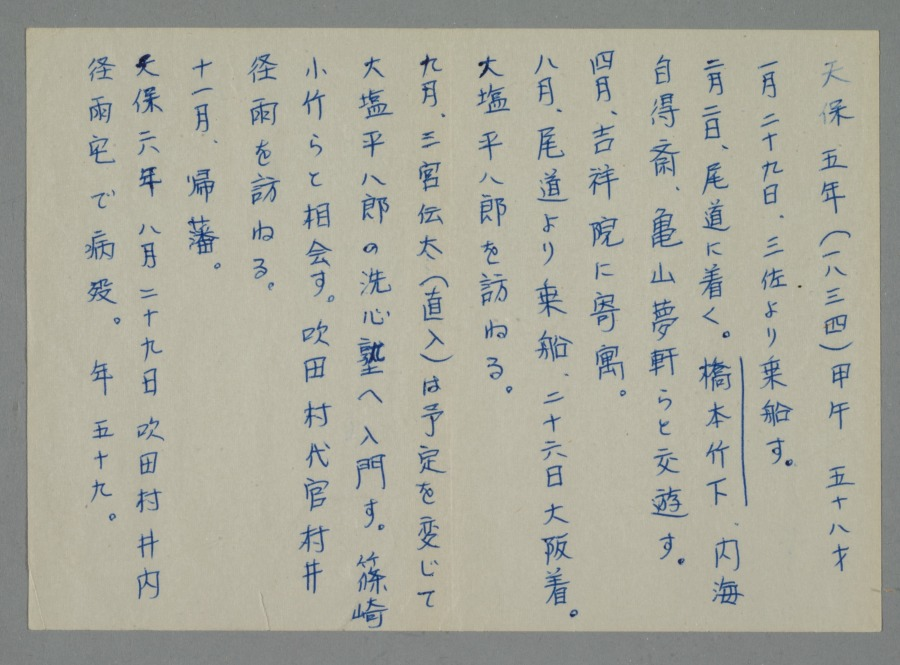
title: Mountain View and Blue Water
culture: Japan, Edo period (1615–1868)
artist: Tanomura Chikuden (Japanese, 1777–1835)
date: early 1800s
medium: hanging scroll; ink, color, and gold on paper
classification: Painting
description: Tanomura Chikuden was an eminent painter whose adopted son, Tanomura Chokunyū (1814–1907), was Seifū Yohei III’s painting teacher. This work was displayed at a gathering commemorating the 10th anniversary of Chokunyū’s death, something we know only because its custom-made box and archival documents have been carefully kept together. The box inscription also confirms that Chikuden was emulating the style of the Mi family of painters, active during China’s Southern Song dynasty (1127–1279). The painting’s Chinese-style silk wrapper is inscribed and sealed on its interior by members of Chokunyū’s community.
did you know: The mountain shapes are built up with multiple small wet strokes.